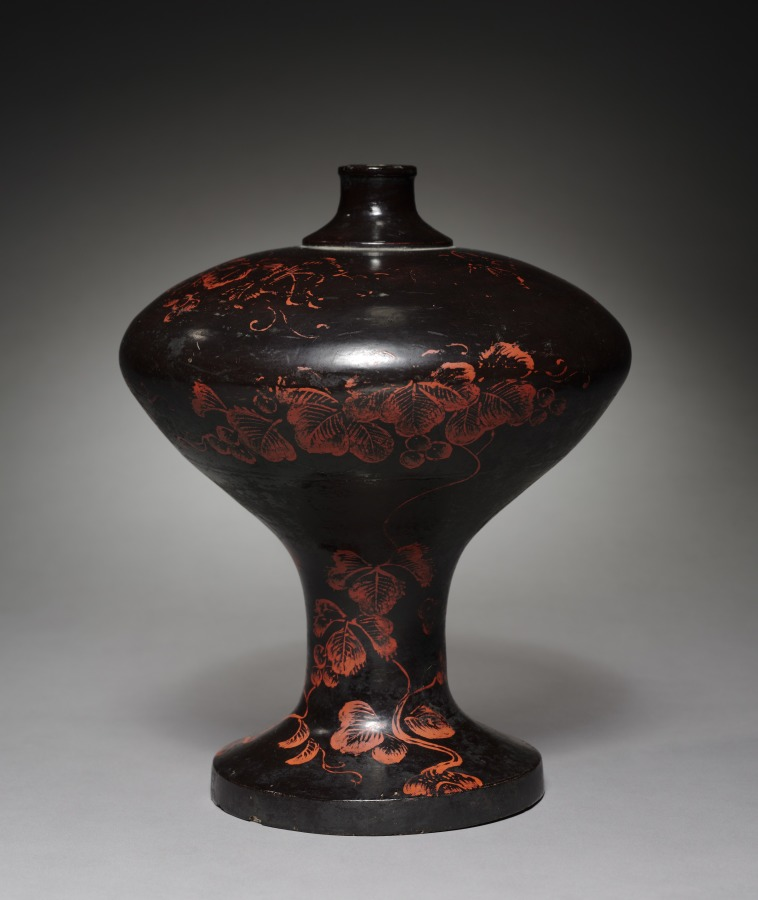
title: Sake Flask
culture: Japan, Muromachi period (1392–1573)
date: 1500s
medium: Black laquered wood with red lacquer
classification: Lacquer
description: This flask contained rice wine, or sake. Its wood body was shaped by a lathe before black lacquer was applied to the surface. A red lacquer design of grapevines, an auspicious motif, covers the surface. With their numerous, long-lasting fruits, grapevines traditionally symbolized fertility and longevity in East Asia.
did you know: The evocative imagery of brushed leaves and bunches of grapes suggest that the artist referred to a particular painting when decorating this vase.